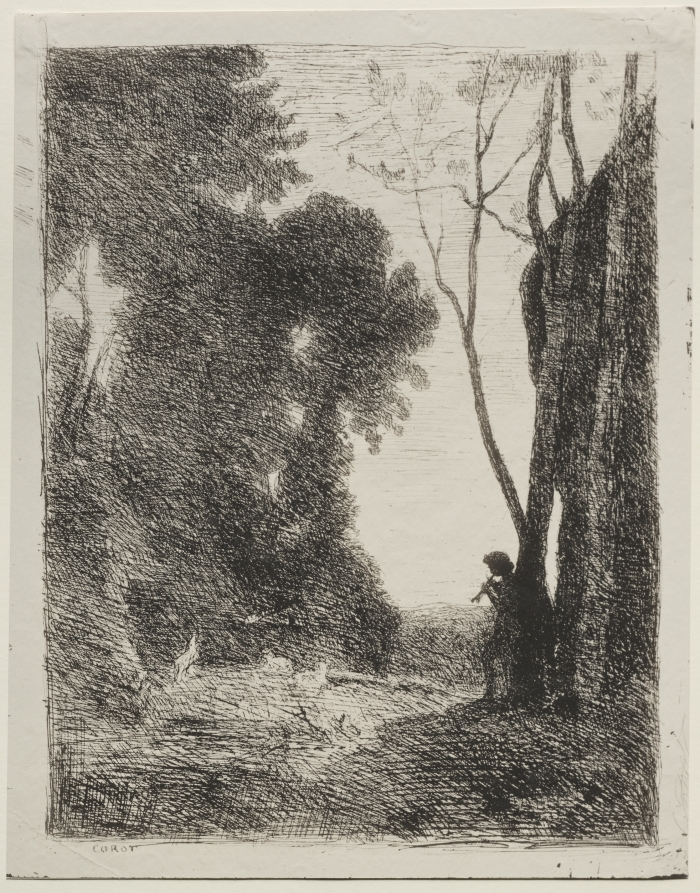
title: The Little Shepherd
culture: France, 19th century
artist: Jean Baptiste Camille Corot (French, 1796–1875)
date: original impression 1855, printed in 1921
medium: cliché-verre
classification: Print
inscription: signed, lower left: "COROT" in glass plate